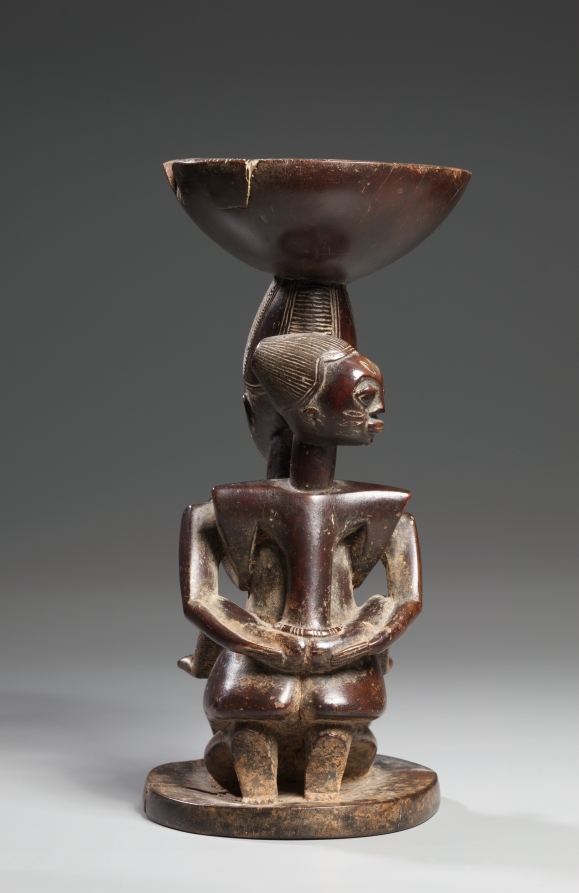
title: Ifá divination vessel (àgéré Ifá)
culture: Africa, West Africa, Nigeria, possibly Èkìtì State, Yorùbá-style carver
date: mid- late 1800s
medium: Wood and colorant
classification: Sculpture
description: The mother figure of this vessel from the Southern Ekiti region represents a devotee who kneels before the gods. The vessel once held the 16 sacred palm nuts essential to divination rituals. The object was used by a priest as a medium through which to communicate with the god of fate, Orunmila, in order to gain insight into an individual’s destiny or to understand the cause of misfortune.